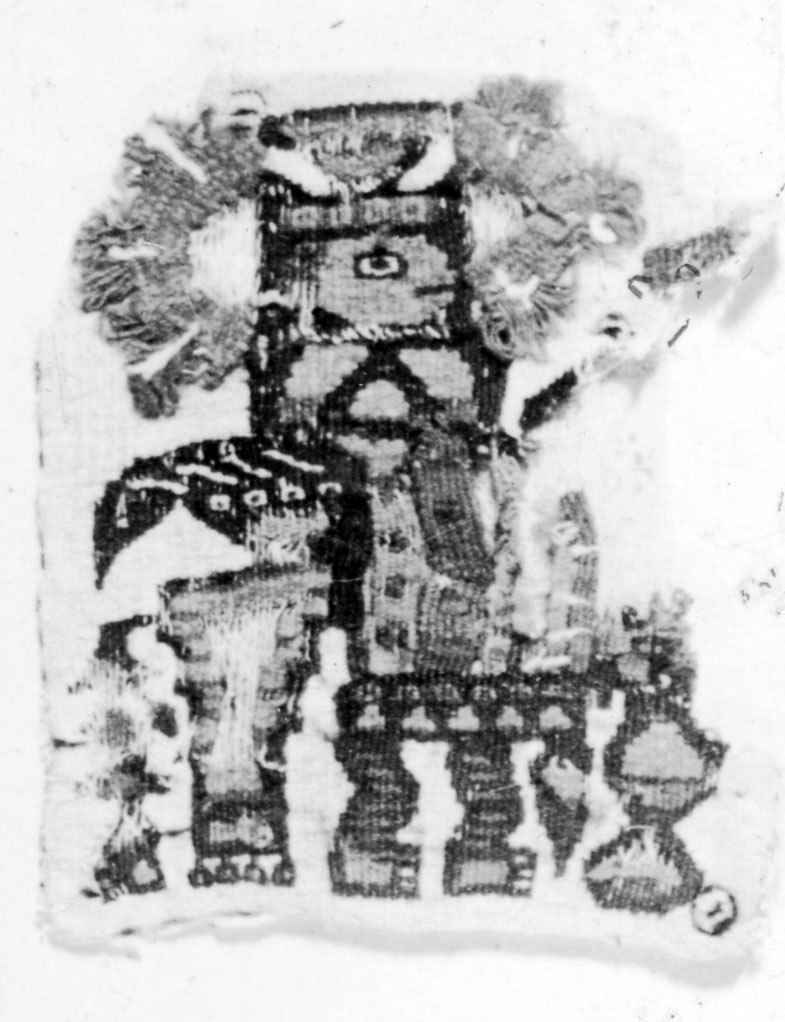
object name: Textile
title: Patch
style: lambayeque, Pre-Columbian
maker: Lambayeque (Probably north coast, Peru)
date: A.D. 1000/1476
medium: Slit tapestry weave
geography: Peru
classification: textile; weaving